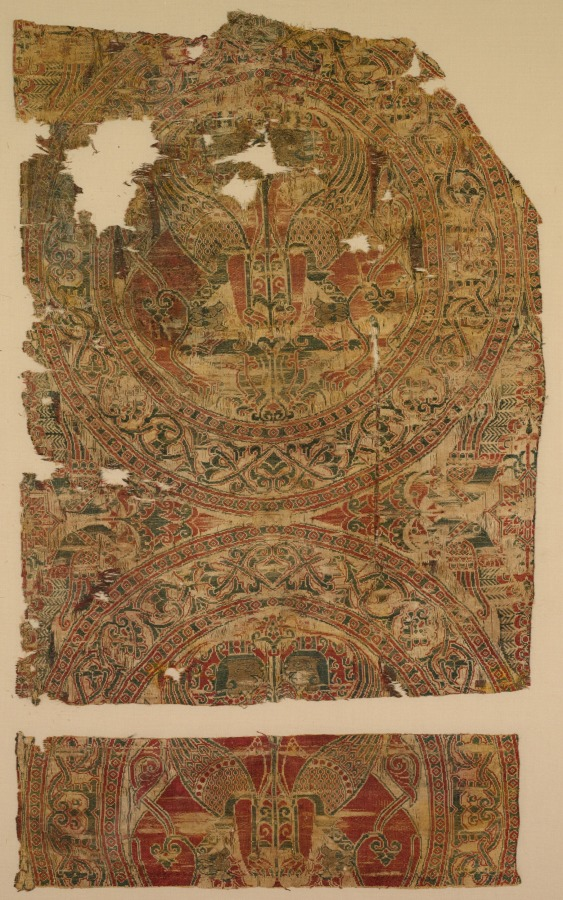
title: Fragment with confronted sphinxes in roundels from the tomb of Saint Bernard Calvo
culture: Spain, Almeria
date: 1200–43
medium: Silk and gold thread: lampas, taqueté, and plain-weave variant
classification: Textile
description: Composite creatures, such as winged lions and sphinxes, predate the rise of Islam in the Arabian Peninsula. Islamic textiles continued to include them for centuries after the Arab conquest of Spain. Pairs of lions with gold faces rear up to bite the haunches of the winged beasts. In between the roundels are pairs of peacocks, motifs traceable to pre-Islamic Persian art that spread throughout the Islamic world, including Spain. The body of Saint Bernard Calvo, the Catholic Bishop of Vich in 1233–43, was wrapped in textiles, including these fragments that still retain traces of his blood.